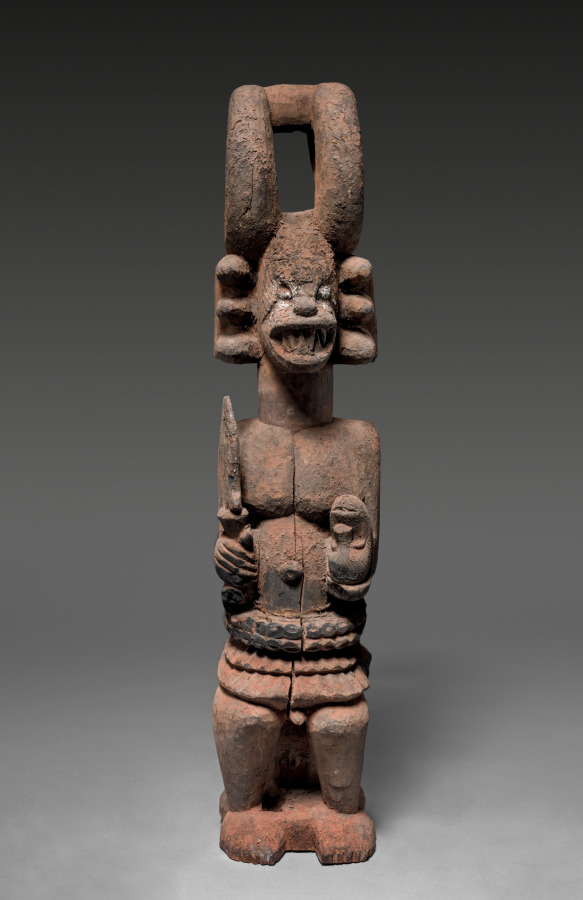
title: Shrine Figure (Ikenga)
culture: Africa, West Africa, Nigeria, Igbo carver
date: possibly early 1900s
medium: Wood, organic materials, and raffia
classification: Sculpture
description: This seated figure of a man holding a cutlass and an inverted human skull is a cult object called ikenga, associated with achievement and success. Standing at the center of a man’s personal shrine, the sculpture receives prayers and sacrifices in return for the ancestors’ guidance. An elaborate headdress comprising two horn-like extensions reinforces the cult’s preoccupation with masculinity, while facial incisions known as ichi refer to membership in one of many male associations.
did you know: This figure associated with achievement and success would have received prayers and sacrifices in return for the guidance of ancestors.